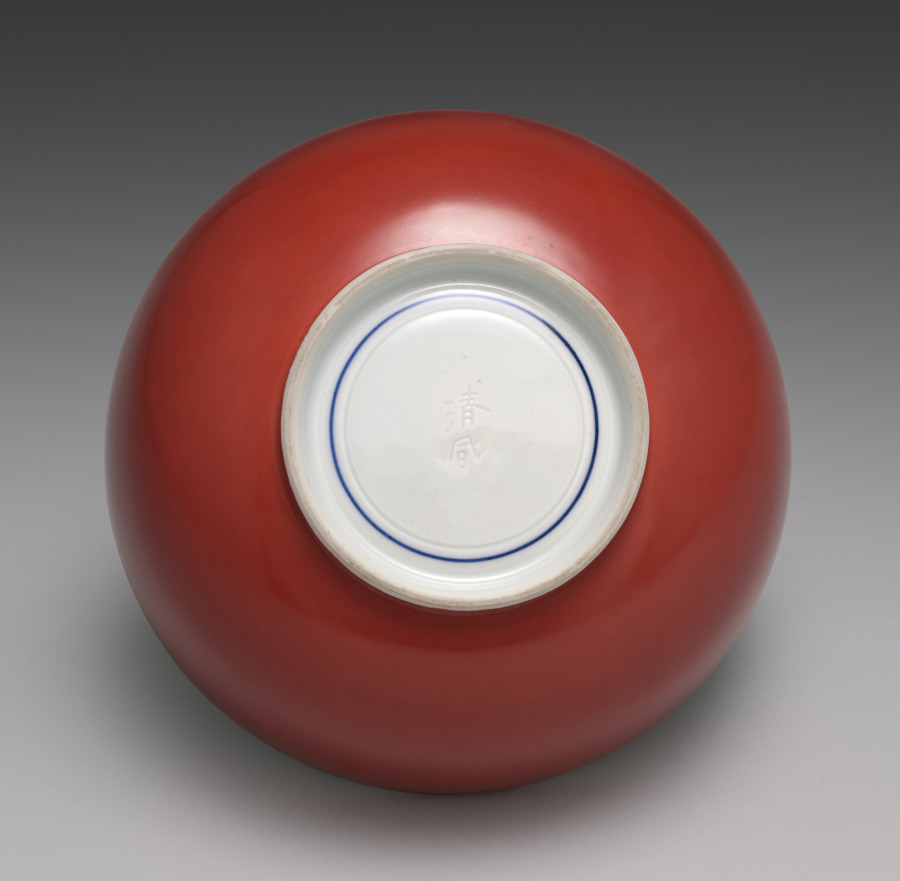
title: Sweets Bowl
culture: Japan, Taishō period (1912–26) or Shōwa period (1926–89)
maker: Seifū Yohei IV (Japanese, 1872–1951)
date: 1914–46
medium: Porcelain with coral red glaze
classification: Ceramic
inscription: 清風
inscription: 成山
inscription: 清風造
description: Like his father, Yohei IV also produced works with red monochrome glazes, like this red coral–glazed sweets bowl with white interior.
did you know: Seifū Yohei IV was active at home and abroad and won international recognition for his ceramic's glazes and designs.